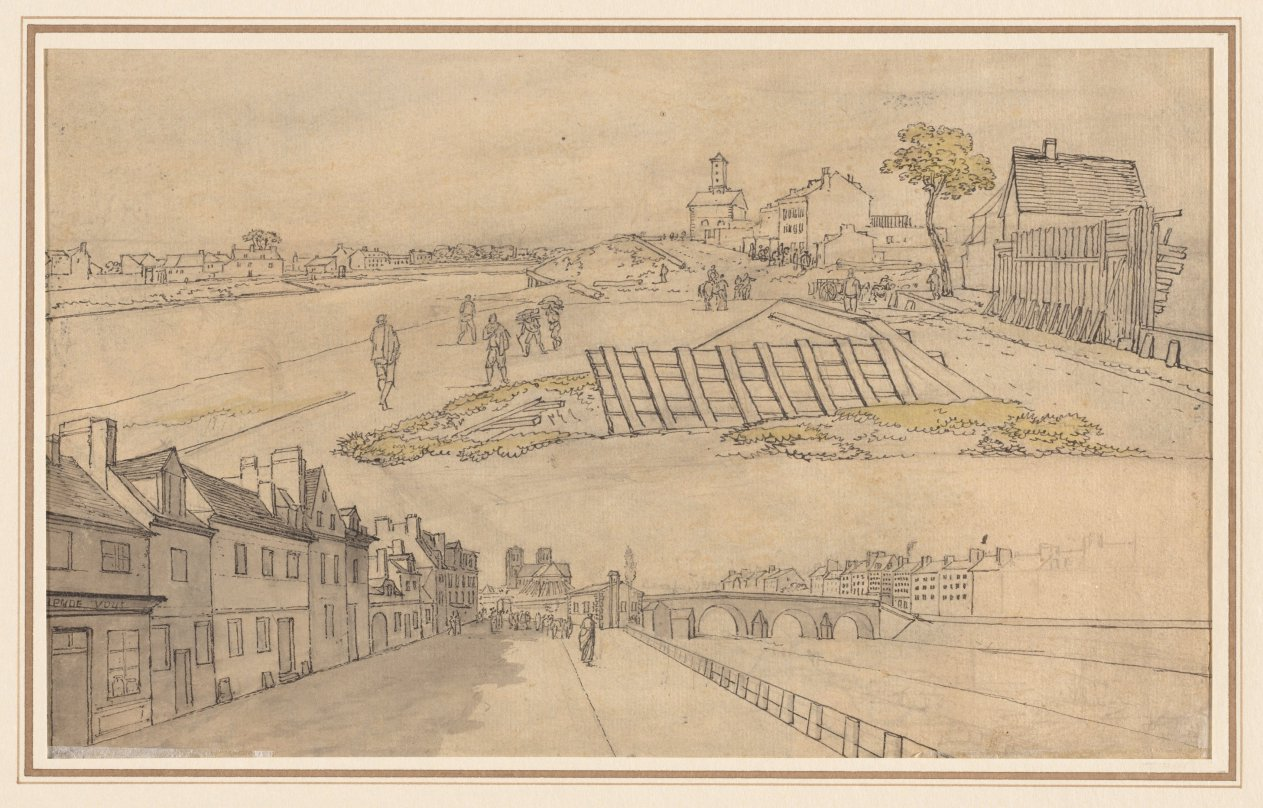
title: Two Views of Paris (verso)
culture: France, 19th century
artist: Georges Michel (French, 1763–1843)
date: 1800–1843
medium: pen and black ink and brush and gray and yellow wash over graphite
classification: Drawing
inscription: SECONDARY SUPPORT, lower right, in graphite: T207